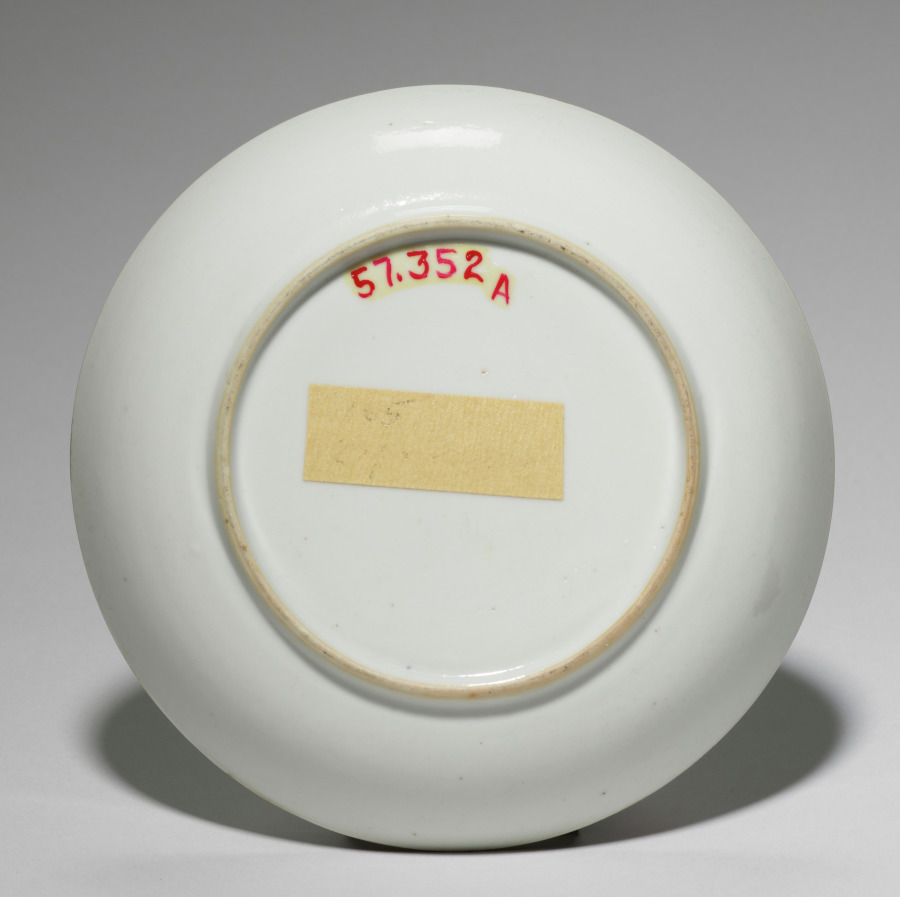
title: Saucer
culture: China, Chinese Export, 19th century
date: 1800s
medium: porcelain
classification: Ceramic